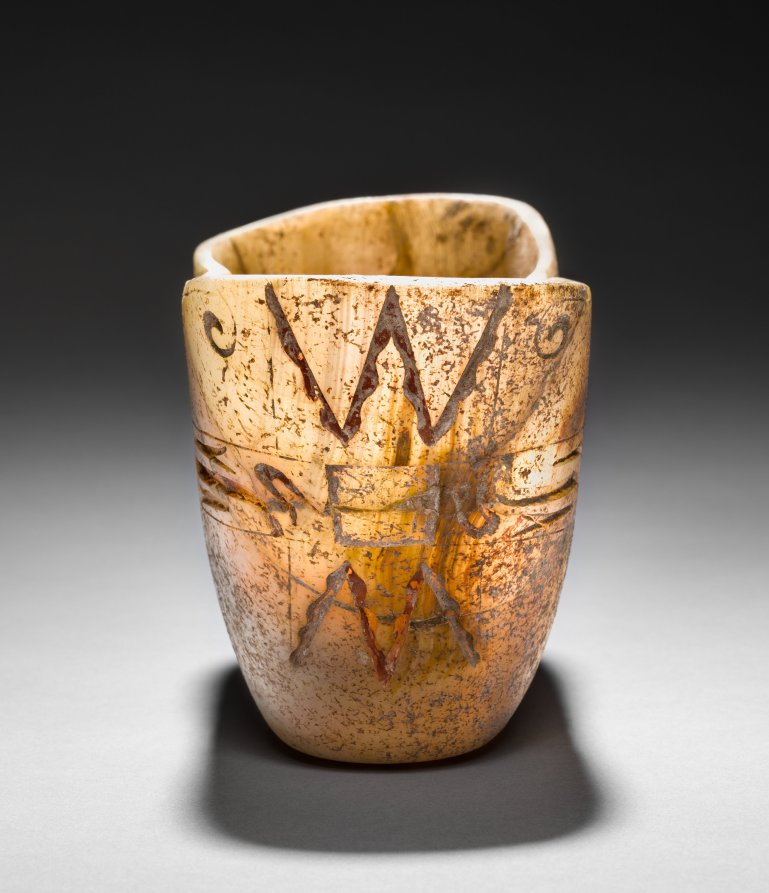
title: Carved Bowl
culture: Mesoamerica, reportedly the Tepecoacuilco River Valley, Guerrero, Olmec style (1200-300 BC), Formative Period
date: 1200–300 BCE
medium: stone (travertine)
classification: Stone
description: Containers made of translucent white travertine, known among the later Aztecs as tecali, are rare in Olmec artistic production. The shape of this elegant example, its rim pinched inward at the center, may refer to a squash. The meaning of the deeply carved abstract motifs, which retain traces of red pigment, is unknown. The bowl is said to have been found in a burial cache that included an Olmec figurine, a hematite mirror, and jade ornaments in Guerrero, Mexico.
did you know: Travertine is a type of limestone deposit commonly found in caves and hot springs.